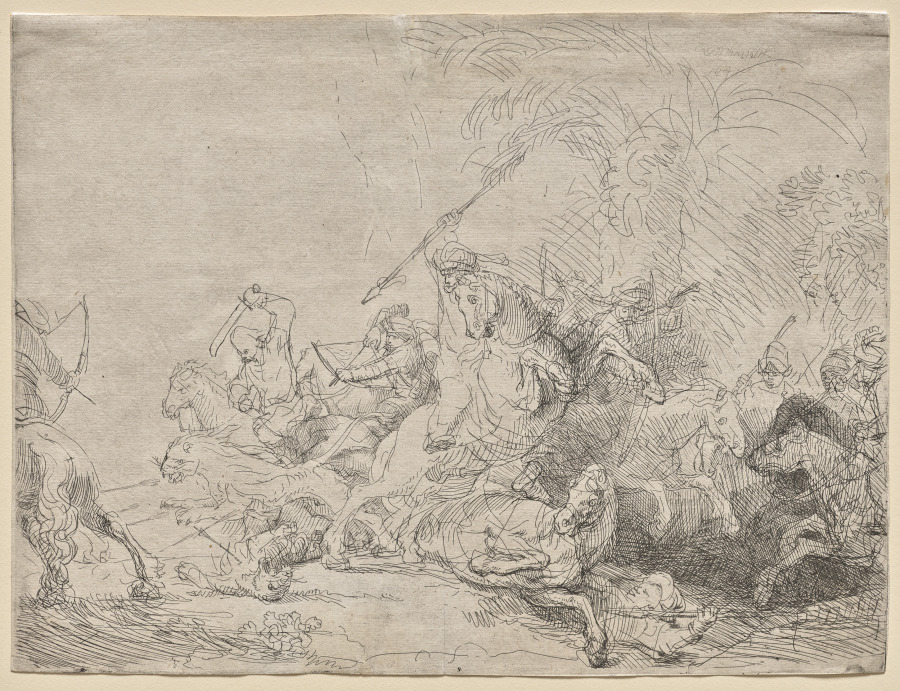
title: The Large Lion Hunt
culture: Netherlands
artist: Rembrandt van Rijn (Dutch, 1606–1669)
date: 1641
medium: etching and drypoint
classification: Print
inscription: upper right, in plate: Rembrandt f / 1941 ; VERSO, lower center, in graphite: D115 ; lower center, in graphite: B. 114 ; lower center, in graphite: B 114[sideways] ; lower right, in graphite: 17 ; lower right, in graphite: C 511[underlined]